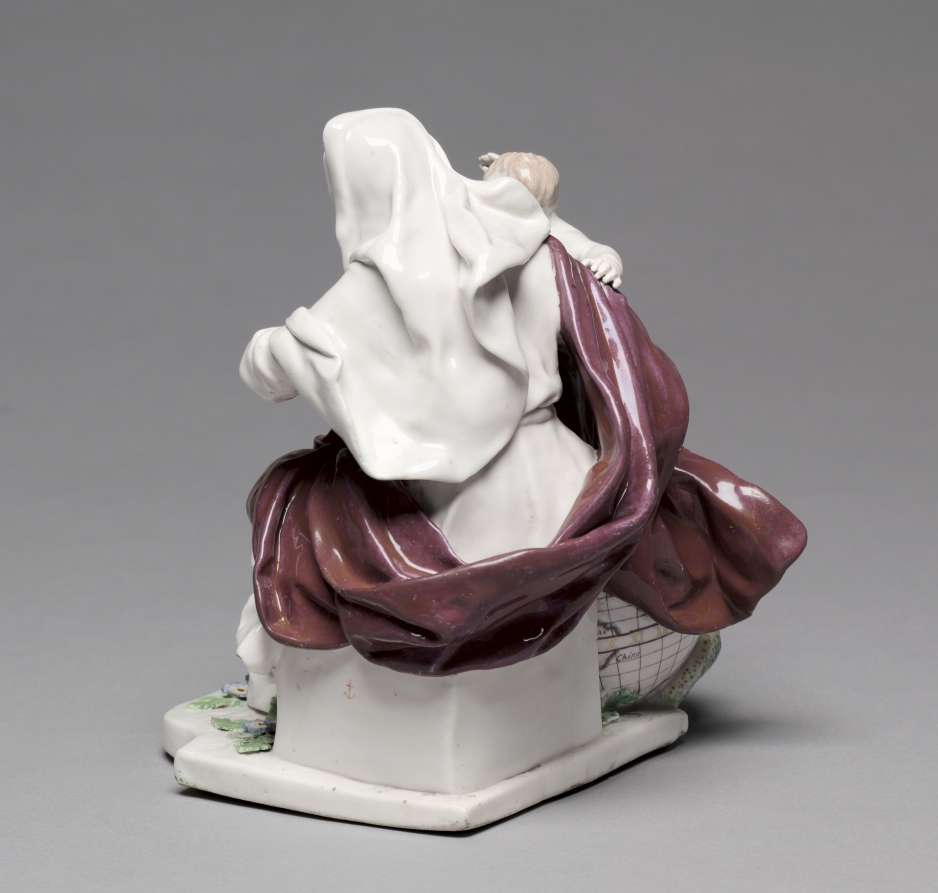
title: Madonna and Child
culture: England, Chelsea, 18th century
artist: Chelsea Porcelain Factory (Britain, London, 1745–84)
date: c. 1755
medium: porcelain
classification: Ceramic